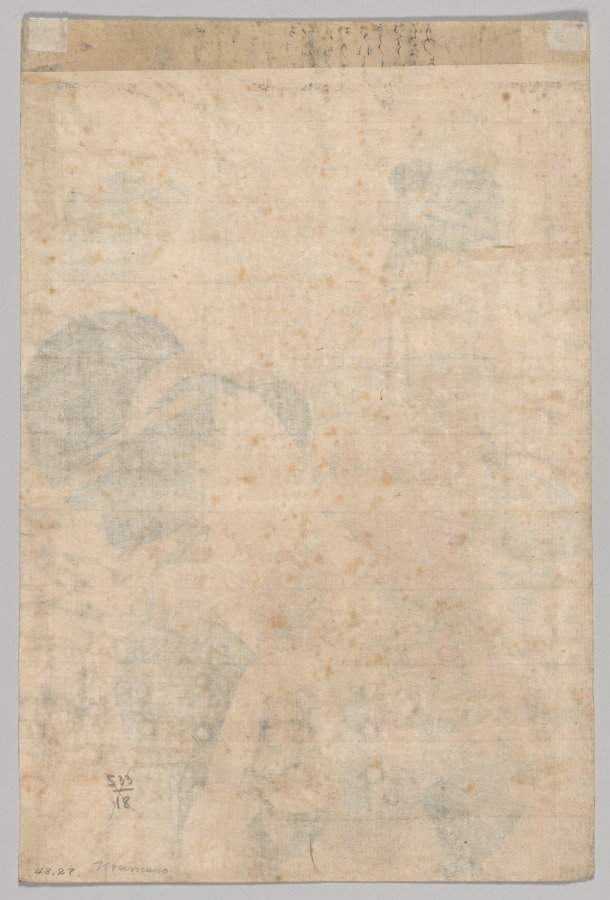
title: Nakatsu, from the series Fifty-three Stations in the Life of a Beauty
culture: Japan, Edo period (1615–1868)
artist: Kitagawa Utamaro (Japanese, c. 1754–1806)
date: c. 1803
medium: color woodblock print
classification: Print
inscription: Signature: Utamaro hitsu Publisher Seal: Maruya Jimpachi